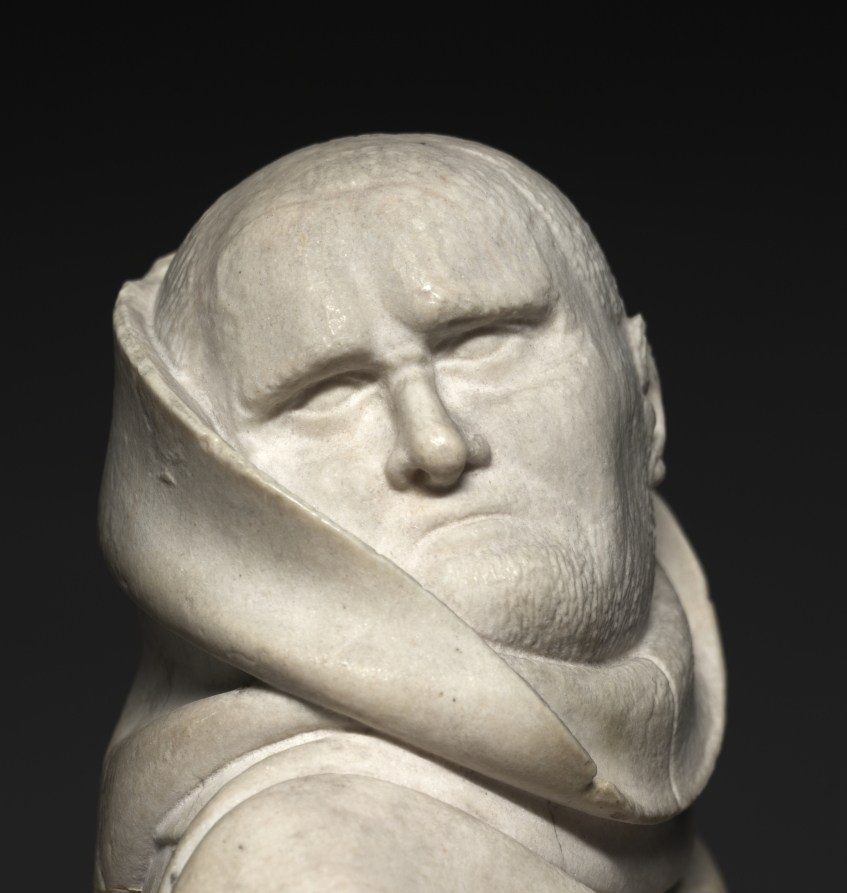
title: Mourner from the Tomb of Philip the Bold, Duke of Burgundy (1364–1404)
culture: Netherlands, active Dijon, 15th century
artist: Claus de Werve (Netherlandish, 1380–1439)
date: 1404–10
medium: vizille alabaster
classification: Sculpture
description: This figure comes from the tomb of Duke Philip the Bold from the church of Champmol near Dijon (Burgundy, France). Philip, who founded the monastery and designated it as his burial place, hired the best artists, many of whom came from the Netherlands. While the commission was given in 1381, the work was not completed until 1410, six years after the duke’s death. This mourner is unusual for the time because it is not carved as a static low relief on the pedestal of the tomb but interact with the viewers and their fellow procession members. The lifelike quality of the figure is due in large part to the alabaster. Its softness allowed artists to carve details into the material, and the transparent, milky white stone could also be polished to a high gloss.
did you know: The use of alabaster in the late Middle Ages began in the 1300s with court art in the circles of French kings, especially in the field of funerary sculpture.